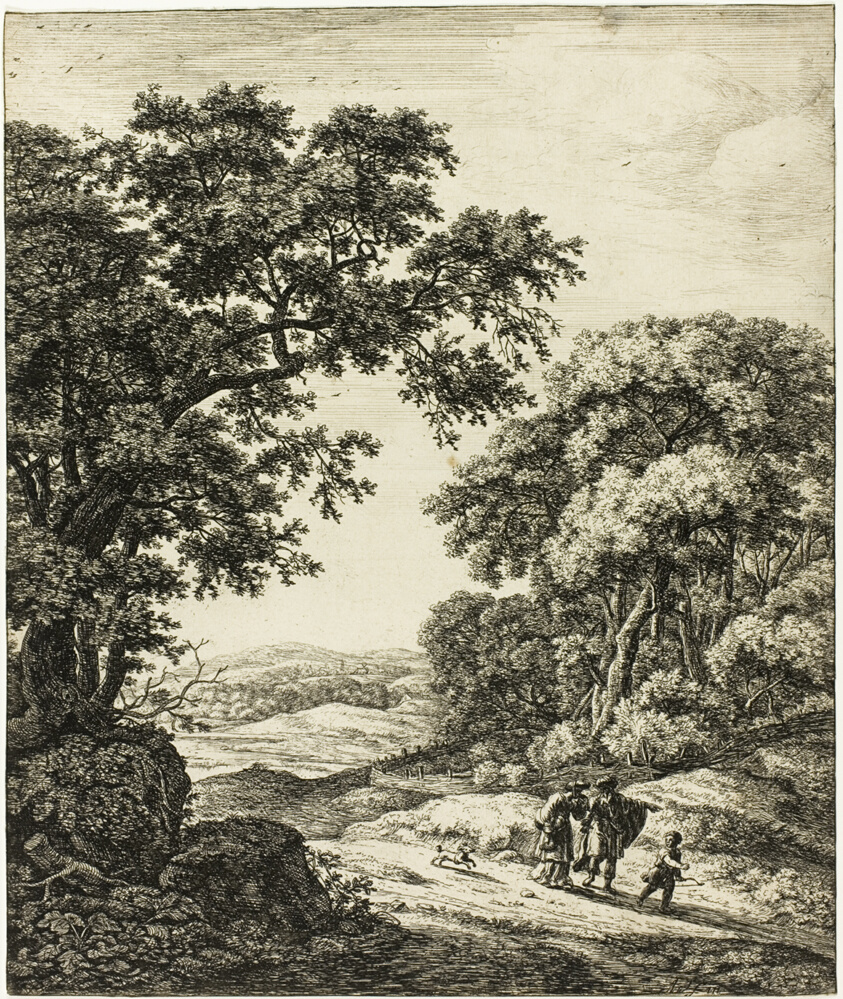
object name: Print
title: Hagar's Departure, from Six Landscape Subjects from the Old Testament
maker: Anthonie Waterloo (Dutch, c. 1610-1690)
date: 1650/60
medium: Etching on paper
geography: Holland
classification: etching; print; prints and drawing